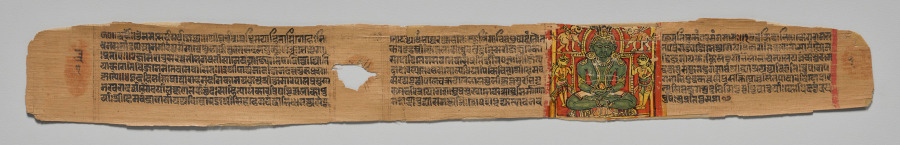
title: Folio 1, from a Great Poem about Twos (Dvyashraya Mahakavya) of Hemachandra with Commentary by Abhayatilaka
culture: Western India, Gujarat, possibly Patan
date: 1428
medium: Gum tempera and ink on palm leaf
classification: Painting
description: The first two folios of this manuscript commentary have adjoining paintings: the first is the green image of Parshva, a liberated being known as a Jina, and the second depicts the author of the text, Hemachandra (1088–1173), as a monk with his royal patron Kumarapala (reigned 1143–1172). The text of this manuscript illustrates grammatical points of both Sanskrit and Prakrit—a living language derived from Sanskrit—with examples of the wondrous deeds of his kings.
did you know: Hemachandra was a celebrated poet, historian, grammarian, philosopher, and theologian of medieval India.